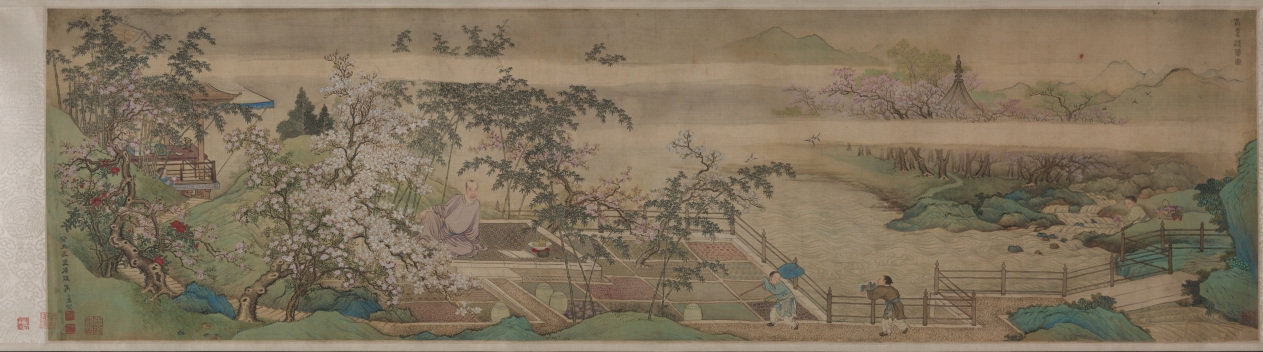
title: Cleansing Medicinal Herbs in the Stream on a Spring Day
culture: China, Qing dynasty (1644-1911)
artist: Yu Zhiding (Chinese, 1647–c. 1716)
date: 1703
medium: Handscroll; ink and color on silk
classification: Painting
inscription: Title by Chen Yixi.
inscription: 姑射仙人冰雪膚，新詩傳唱滿通都。/ 極知遲暮難為別，更展春泉洗藥圖。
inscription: Colophon by Chen Tingjing 陳廷敬 (1639–1712). Colophon by Wang Hongxu 王鴻緒 (1645–1723), dated 1707. Colophon by Song Luo 宋犖 (1634–1714). Colophon by Liu Yan 劉巗. Colophon by Jing Xikui 涇西夔. Colophon by Liu Yan 劉巗. Colophon by Cao Yin 曹寅. Colophon by Wang Shihong 汪士鋐. Colophon by Wang Shidan 王式丹 (1645–1718), dated 1712. Colophon by Shi Shenyi 史申義 (1661–1712), dated 1712. Colophon by Yin Yuqing 殷餘慶, dated 1712.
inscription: Colophon by Chen Shixia 陳時夏, dated 1729.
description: A famous portraitist, Yu Zhiding here depicts the likeness of Shi Shenyi 史申義 (1661–1712), an official and poet. Master Shi, a sickly man, was deeply interested in medicinal science. The opening section of the scroll features a boy washing a fungus in fresh spring water, a basket of medicinal herbs by his side. Other servants carry a fan, a bundle of scrolls, and a cup of tea or hot wine. Master Shi sits in a bamboo grove, surrounded by fields of herbs. Returning swallows, pink peach blossoms, and blooming magnolia indicate spring, whereas the fungus conveys wishes for long life. The spring theme may express the artist’s wish for his friend’s recovery.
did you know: In the pavilion are some of Shi Shenyi’s scholarly accoutrements: a stack of books, an antique zun 尊 (wine vessel), a brush holder, an ink stone, and a small chime.